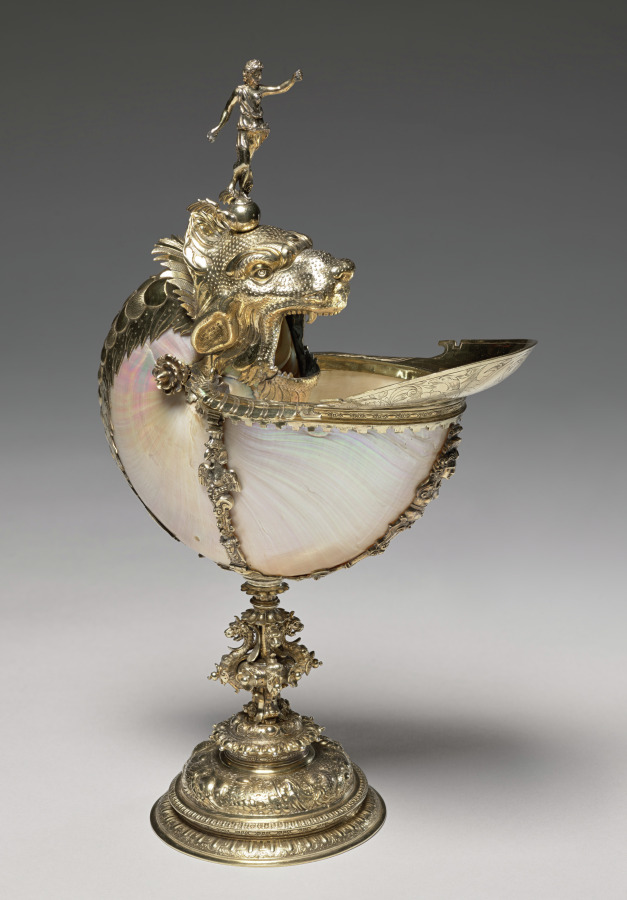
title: Nautilus Cup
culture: Netherlands, Holland, Delft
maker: Cornelis Jansz van der Burch (Dutch, active in Delft, d. 1615)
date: 1607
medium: Silver-gilt, nautilus shell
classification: Metalwork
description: Nautilus shells were brought to the Netherlands from Indonesia. Skilled Dutch silversmiths mounted them in silver, creating luxurious vessels that were sought after by wealthy collectors. Early Dutch nautilus cups are mainly associated with the city of Delft, although only a few other examples made in Delft are known from the late sixteenth and early seventeenth centuries. They feature the dramatic motif of a sea monster’s head.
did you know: The nautilus is a marine mollusk that swims by expelling water from its shell using jet propulsion.